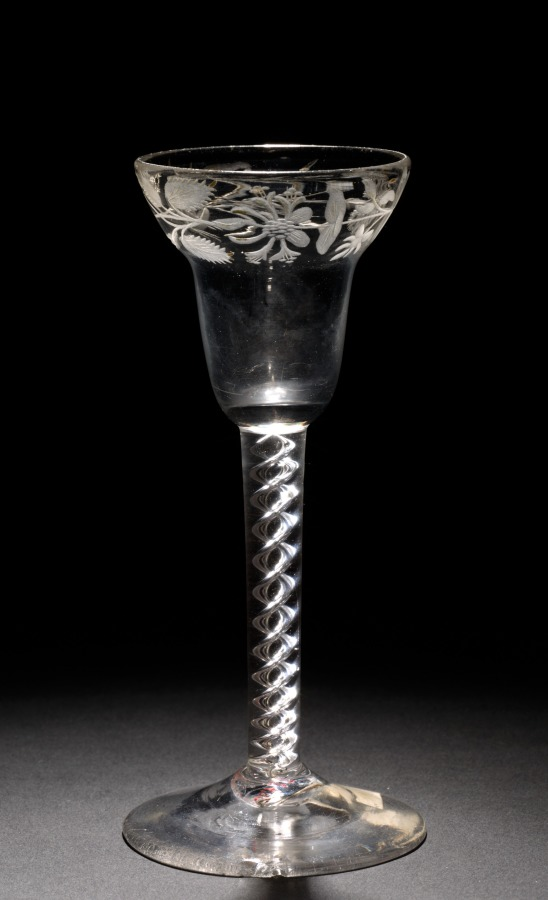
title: Wine Glass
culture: England, 18th century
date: 1750–1799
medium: glass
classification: Glass